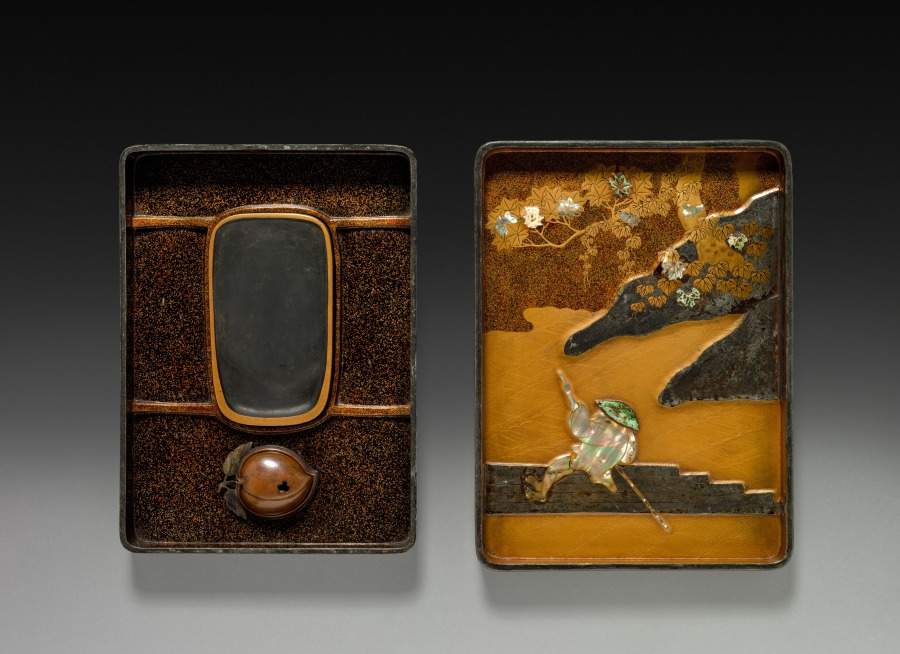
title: Inkstone Case and Lid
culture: Japan, Edo period (1615–1868)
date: 1800s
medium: lacquer on wood inlaid with mother-of-pearl, applied carved metal, and glazed ceramic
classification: Lacquer